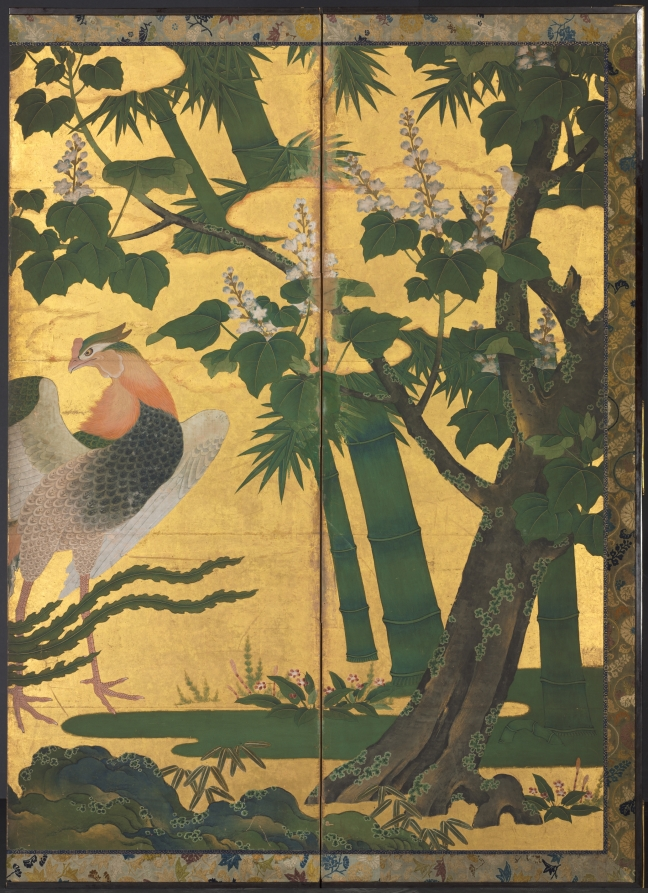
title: Phoenixes and Paulownia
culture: Japan, Momoyama period (1573–1615)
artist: attributed to Tosa Mitsuyoshi (Japanese, 1539–1613)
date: late 1500s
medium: One of a pair of six-panel screens; ink, color, and gold on gilded paper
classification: Painting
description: The immense heraldic birds on display in these byøbu reflect the Momoyama era's spirit of newly gained self-confidence and an affinity for grand expressive statements in painting, architecture, the textile and ceramic arts, as well as garden design. While that period preceded the arrival of prosperity, it clearly marked an extra---ordinary moment in Japanese cultural history, one frequently compared with the twelfth century of the Heian period. Through the extensive use of gold-foil backgrounds rather than the somber palette of carefully orchestrated ink tones evident in Muromachi byøbu, patrons colla-borated with artists as well as craftsmen in fostering a decidedly new look in much of Japanese painting. Here for instance there is no imaginary vista suggesting China's vast waterways and mountain ranges. The setting is composed instead of highly stylized lozenges of mineral green paint, suggesting the earth from which clumps of grass, flowering plants, and towering bamboo and paulownia trees emerge. Clusters of lumpy, blue-green rocks dotted with lichen provide stabilizing three-dimensional foils for these islands of vegetation as well as the all-encompassing flat, golden surface. The glorious artificiality of the setting precisely serves the artist's effort to compose a credible yet other-worldly vista for depicting the legendary phoenix gazing across the landscape at the pair of peacocks. Rather than an emblem of immortality, as it is in Western lore, in Japan the phoenix evolved out of its origins in Chinese mythology to become, by the sixteenth century, an auspicious symbol of political authority. Together with clusters of the distinctively shaped paulownia leaves, this long-tailed, mythical bird graced lacquerware as well as mural paintings, proclaiming an air of graceful com-mand. A characteristic infusion of temporality has been included also, through a seasonal flowering schema extending from spring to early summer (right) to fall and the advent of winter (left). Although traditionally attributed to the Tosa school master Tosa Mitsuyoshi (1539-1613), these byøbu possess neither seals nor signatures to confirm that authorship. Known for his jewel-like, modest-sized album paintings of courtly narratives such as The Tale of Genji, it is likely both studio training and contemporary fashions in patronage conspired to produce a good number of such byøbu. This example from the Momoyama era represents one such effort from a masterful Tosa painter, too little seen in Western collections.